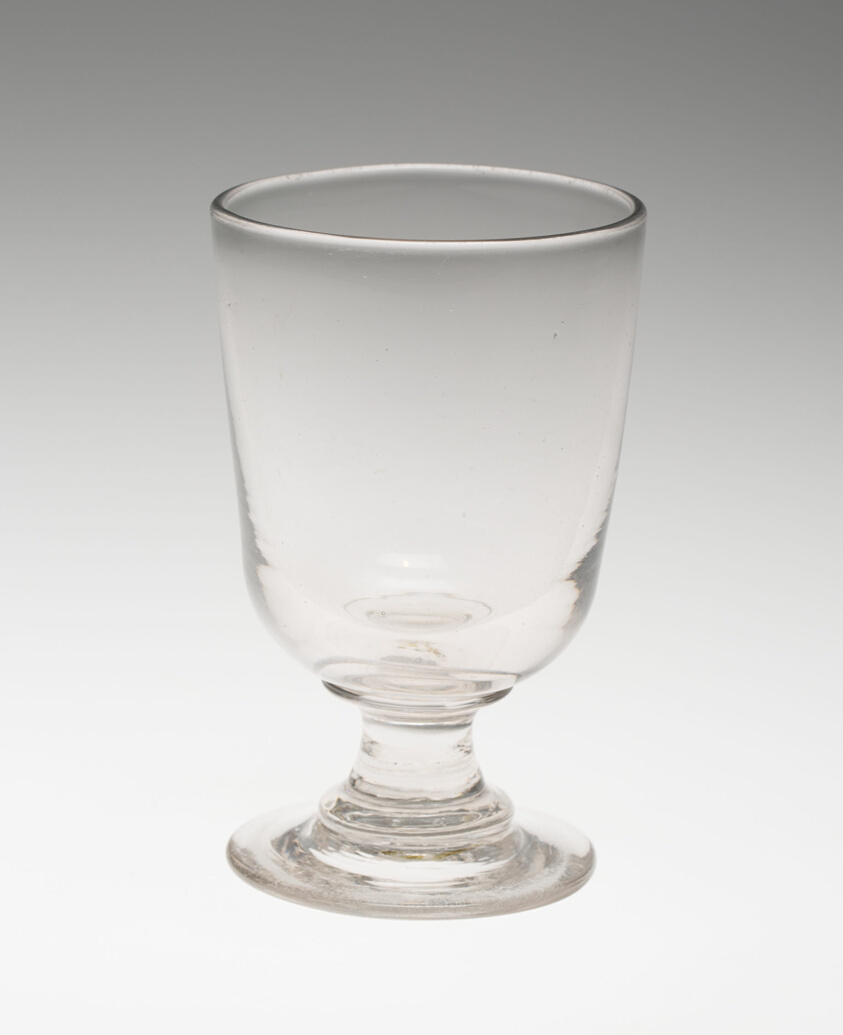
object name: Glass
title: Rummer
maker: England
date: 1750/1850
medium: Glass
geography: England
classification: glass